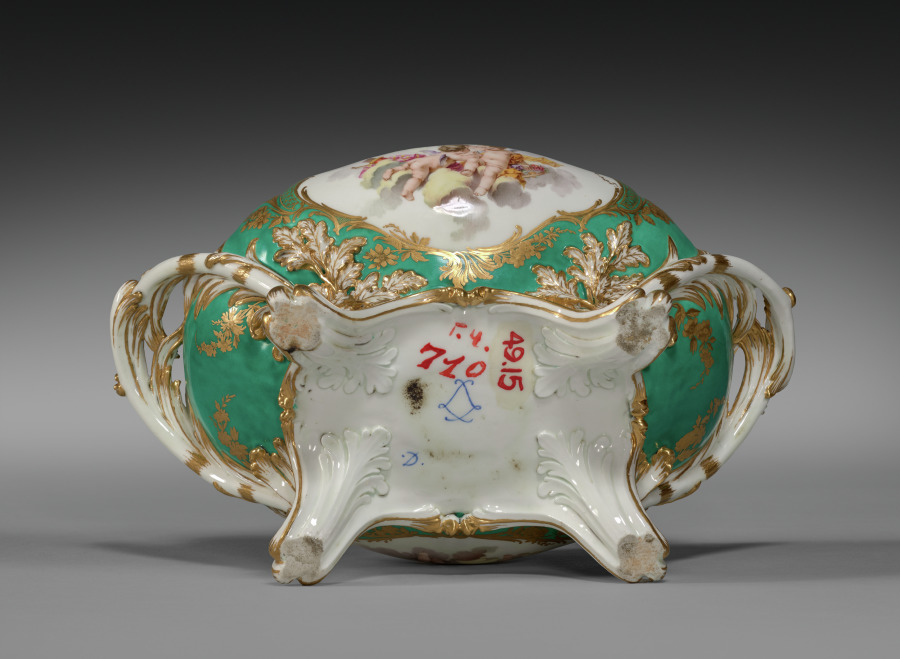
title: Tureen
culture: France, Sèvres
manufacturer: Sèvres Porcelain Factory (French, est. 1756)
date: 1756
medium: soft-paste porcelain with enamel and gilt decoration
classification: Ceramic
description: This tureen is probably from a service presented by Louis XV to King Frederick V of Denmark in 1758.